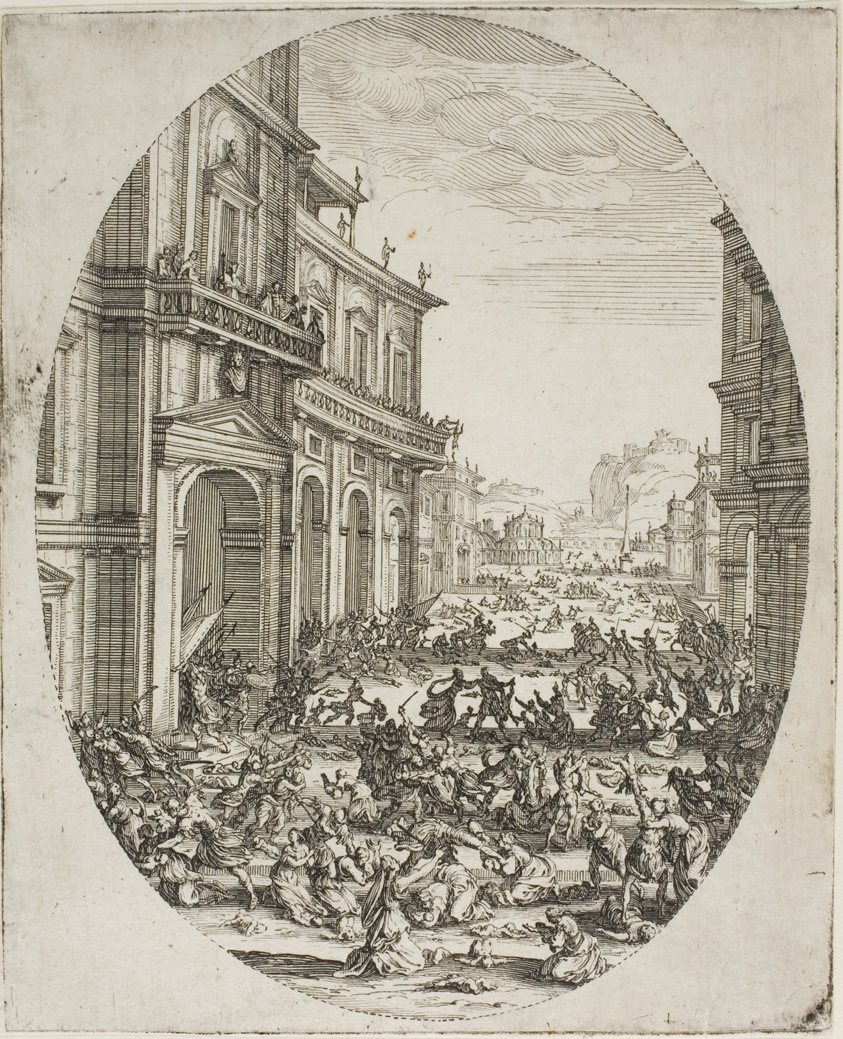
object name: Print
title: The Massacre of the Innocents (Second plate)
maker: Jacques Callot (French, 1592-1635)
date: 1622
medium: Etching and engraving on paper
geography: France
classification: etching; print; prints and drawing